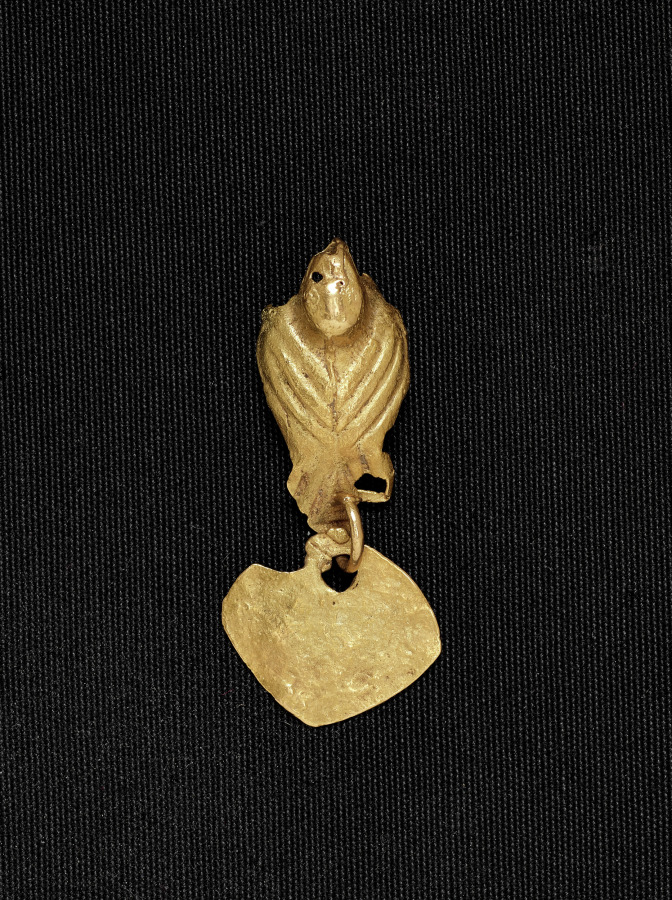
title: Bird Bead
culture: Colombia, Muisca style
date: c. 900–1550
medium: cast gold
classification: Jewelry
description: Muisca metalwork divides into two categories: ornaments to be worn, such as these, and offering figurines, in the case to the right. The elaborate bird pendant features delicate herringbone moldings, openwork patterns, and wing details-all part of the wax model from which the pendant was cast (see nearby computer animation). The dangles were attached after casting.